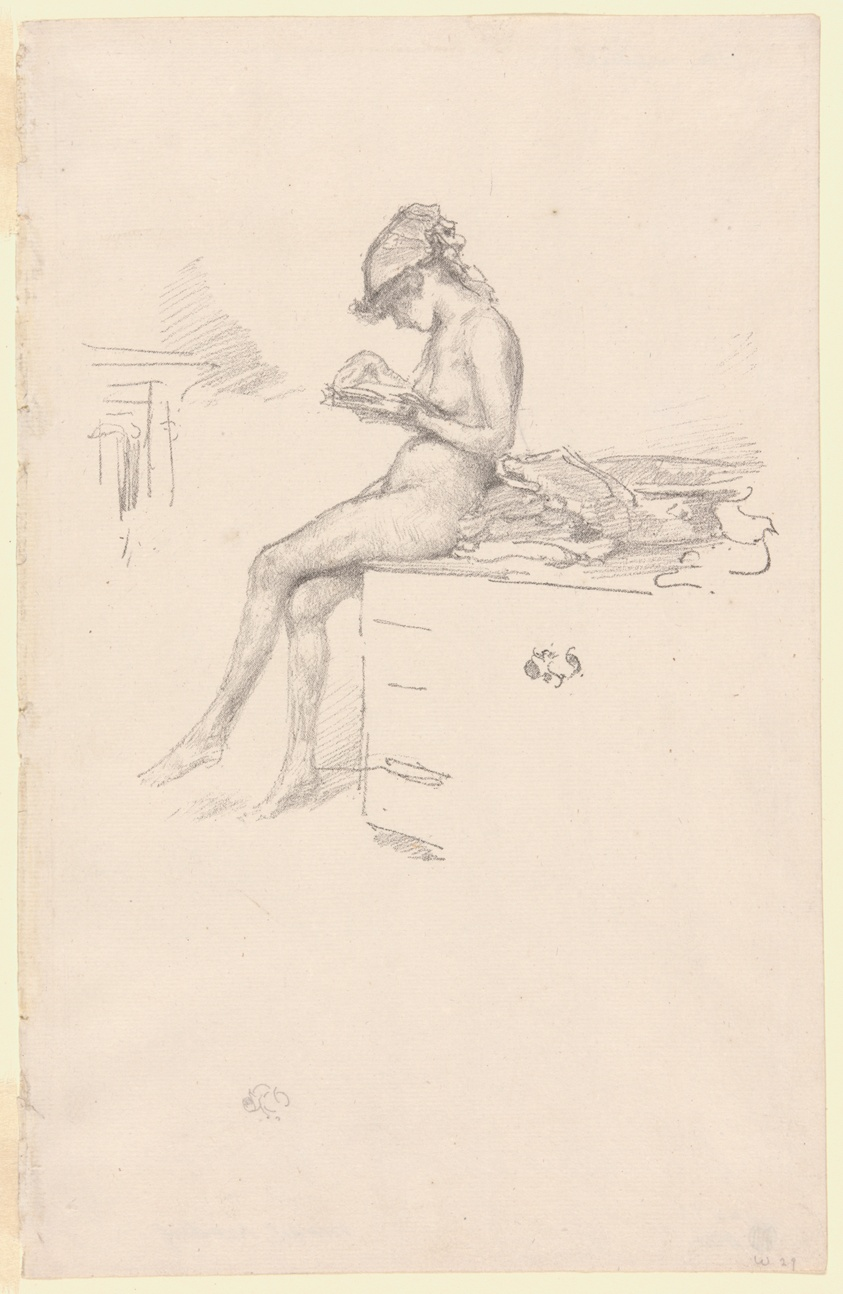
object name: Print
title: The Little Nude Model, Reading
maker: James McNeill Whistler (American, 1834-1903)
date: 1889/90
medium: Transfer lithograph in black on ivory laid paper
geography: United States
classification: transfer lithograph; lithograph; print; prints and drawing; paper